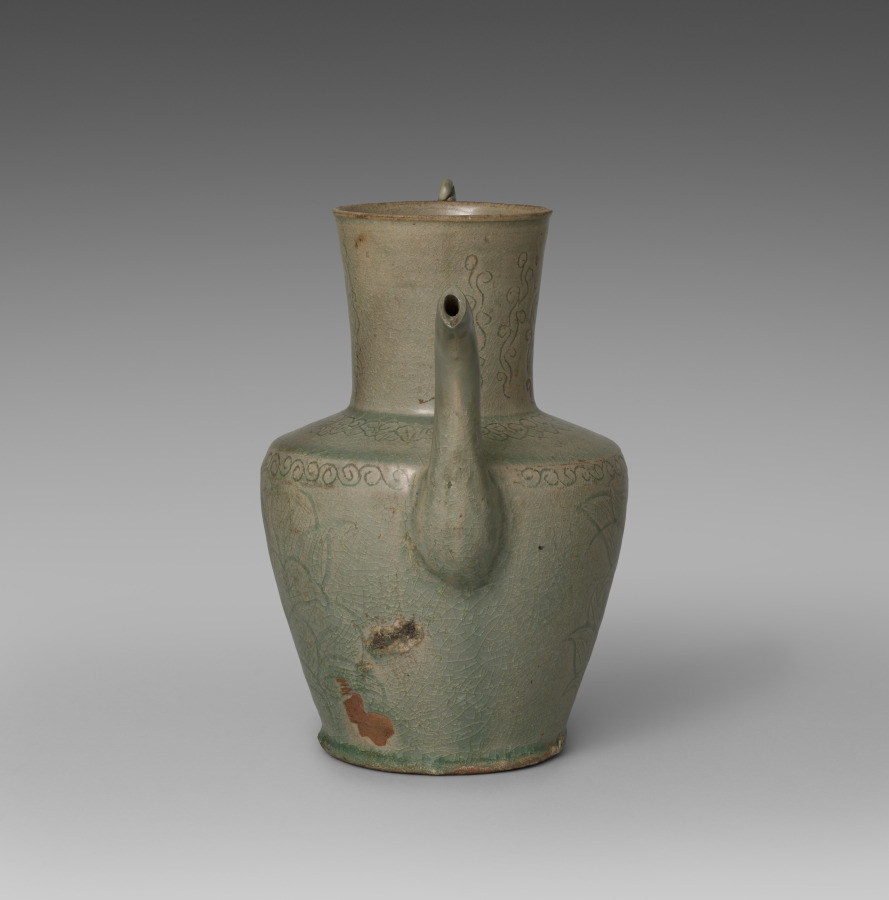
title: Wine Pot with Incised Lotus Design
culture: Korea, Goryeo dynasty (918–1392)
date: 918–1392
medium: celadon ware with incised and carved decoration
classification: Ceramic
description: As early as the seventh century, the practice of drinking tea and wine became an important part of elite culture in Korea. Elites of the Goryeo period commissioned a variety of types of utensils and vessels including this elegant wine pot with the incised image of lotus flowers, not only to make their drinking experience more exciting, but also to show their appreciation of nature.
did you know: A small loop on the handle was intended to secure the lid (now missing) on top of the pitcher through a cord or chain.